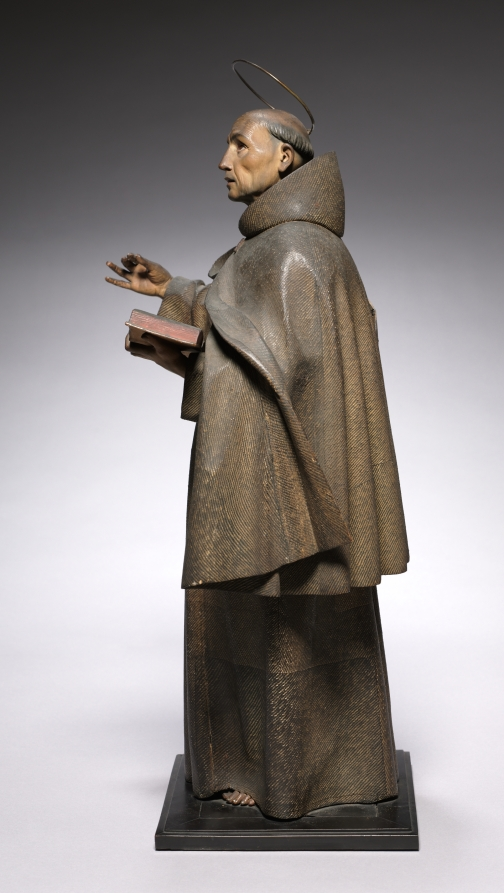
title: Saint Peter of Alcántara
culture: Spain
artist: Pedro de Mena (Spanish, 1628–1688)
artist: and Workshop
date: c. 1663–70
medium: painted wood, with ivory and glass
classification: Sculpture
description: Painted wood sculpture from Spain in the 1600s involved a team of artisans working under a lead sculptor. The sculptor first carved numerous pieces of wood in complex forms. So the paint would stick properly, these fragments were delicately covered in gesso (a combination of white chalk and glue made from animal collagen), preserving the subtle woodcarving underneath. The rough surface of the saint's face—reflecting his age and hardships—came from texturing the gesso with a brush. The glass eyes, probably imported from Venice, were inserted from behind the face before the wood pieces were attached. Finally, the eyelashes were added for a further touch of realism. A painter created the appearance of coarse sackcloth in a distinctive style, with yellow strokes rising off the surface. Smoother brushstrokes form the flesh tones, even revealing the saint's five-o'clock shadow. Unlike other kinds of painting, sculpture from southern Spain at this time was usually not covered in varnish; sculptors prized the unvarnished paint for its realistic effect, although it makes the surface exceptionally delicate and susceptible to dust and dirt, which more easily sticks to the surface.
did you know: Peter of Alcantara was so dedicated to his work he slept only 90 minutes a night--he's the patron saint of night watchmen!